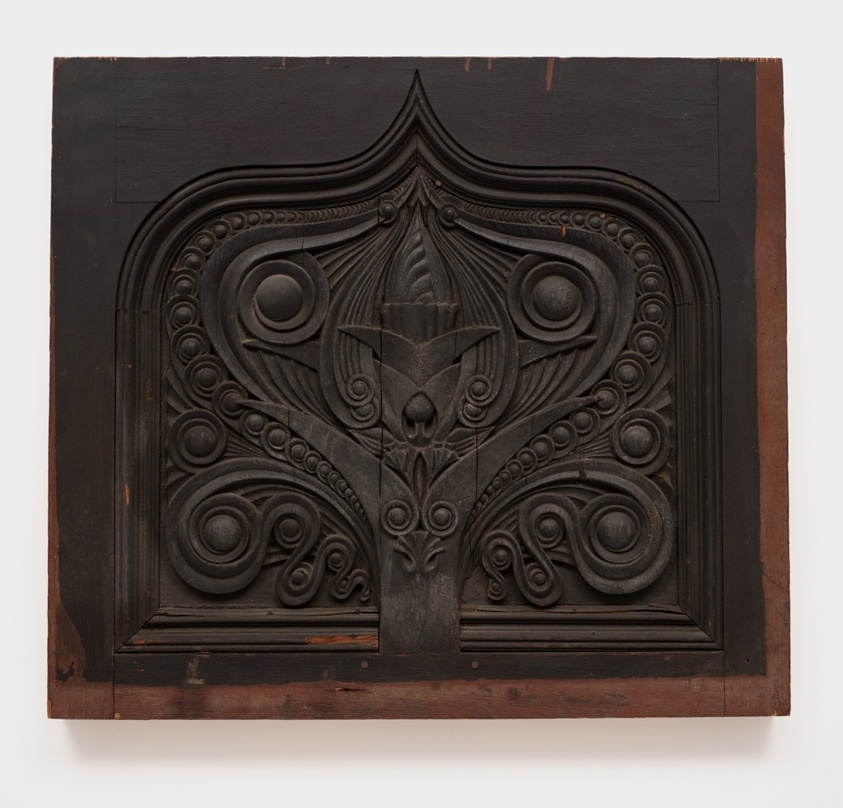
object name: Architectural fragment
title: Door panel from the Henry Stern House, Chicago, Illinois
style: 19th century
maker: Adler & Sullivan; American, 1883-1896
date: 1885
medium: Painted wood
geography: United States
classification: architecture; architectural fragment; chicago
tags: Chicago, architectural fragment, architecture, doors, Fragment, panel, wood